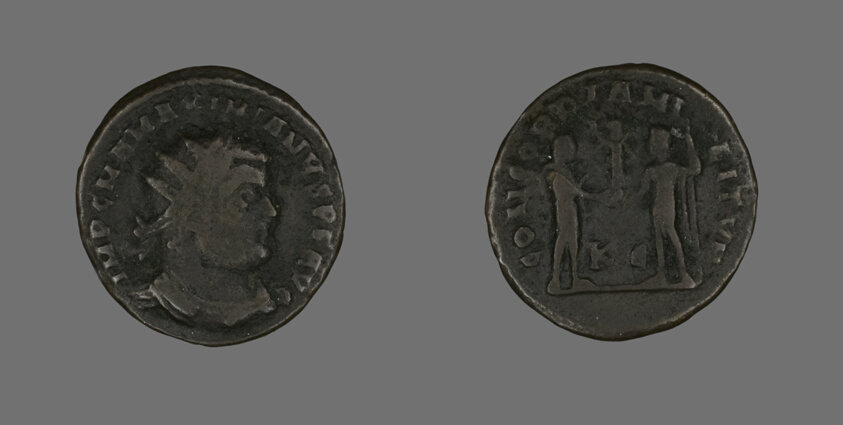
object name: Coin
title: Coin Portraying Emperor Maximianus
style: roman (ancient, style or period), ancient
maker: Roman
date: 286-305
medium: Bronze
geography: Roman Empire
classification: coin; ancient art